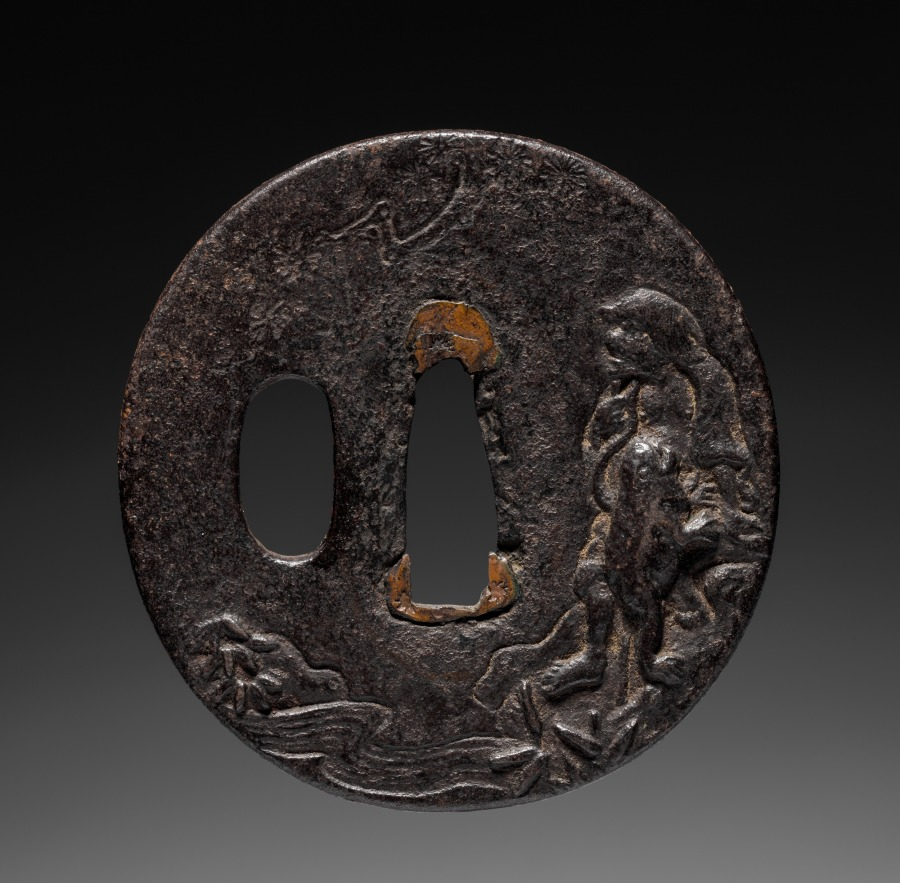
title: Sword Guard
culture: Japan, Edo period (1615–1868)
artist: Masayuki (Japanese, 1691–1764)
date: c. 1762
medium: iron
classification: Arms and Armor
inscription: Signature: Masayuki, executed at the age of seventy-one